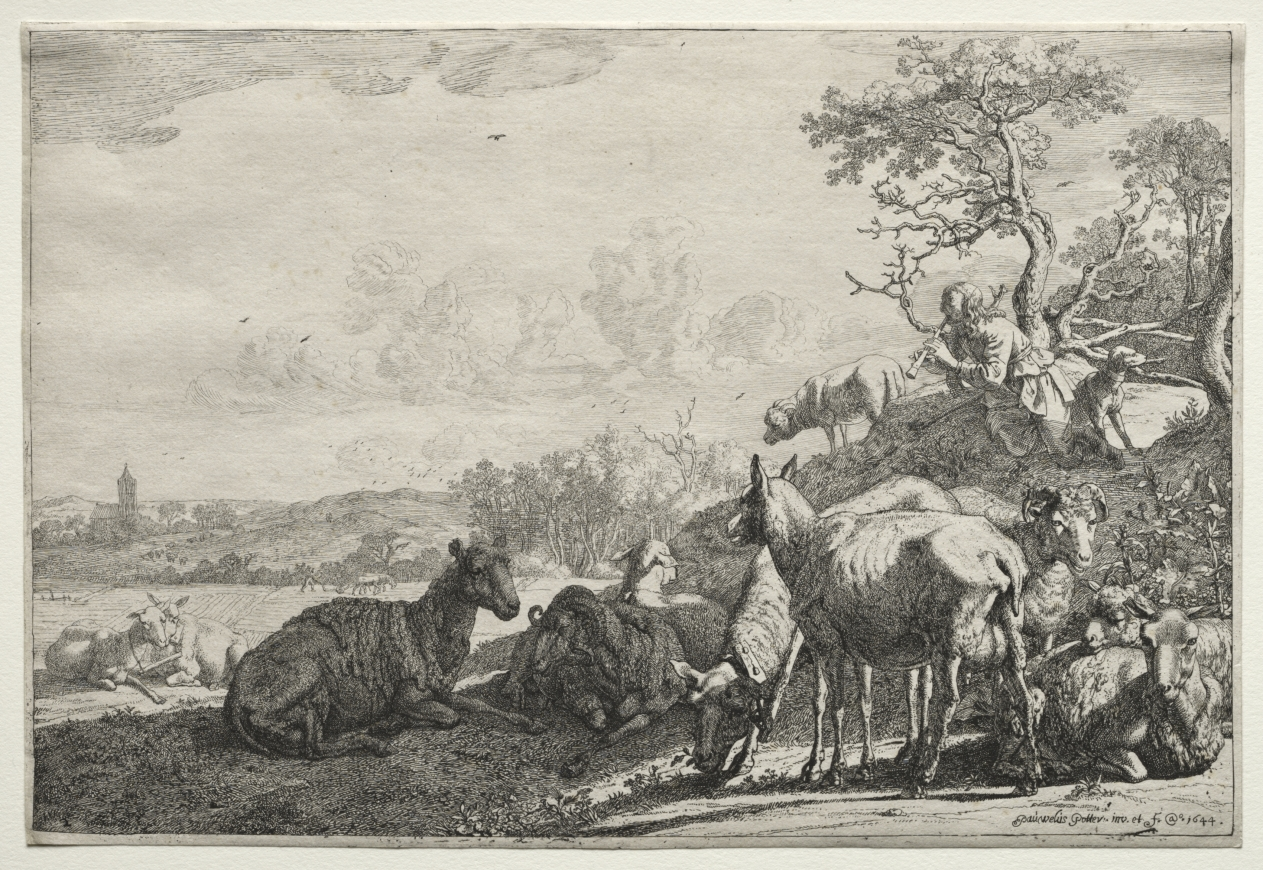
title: The Shepherd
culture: Netherlands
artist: Paulus Potter (Dutch, 1625–1654)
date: 1644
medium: etching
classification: Print